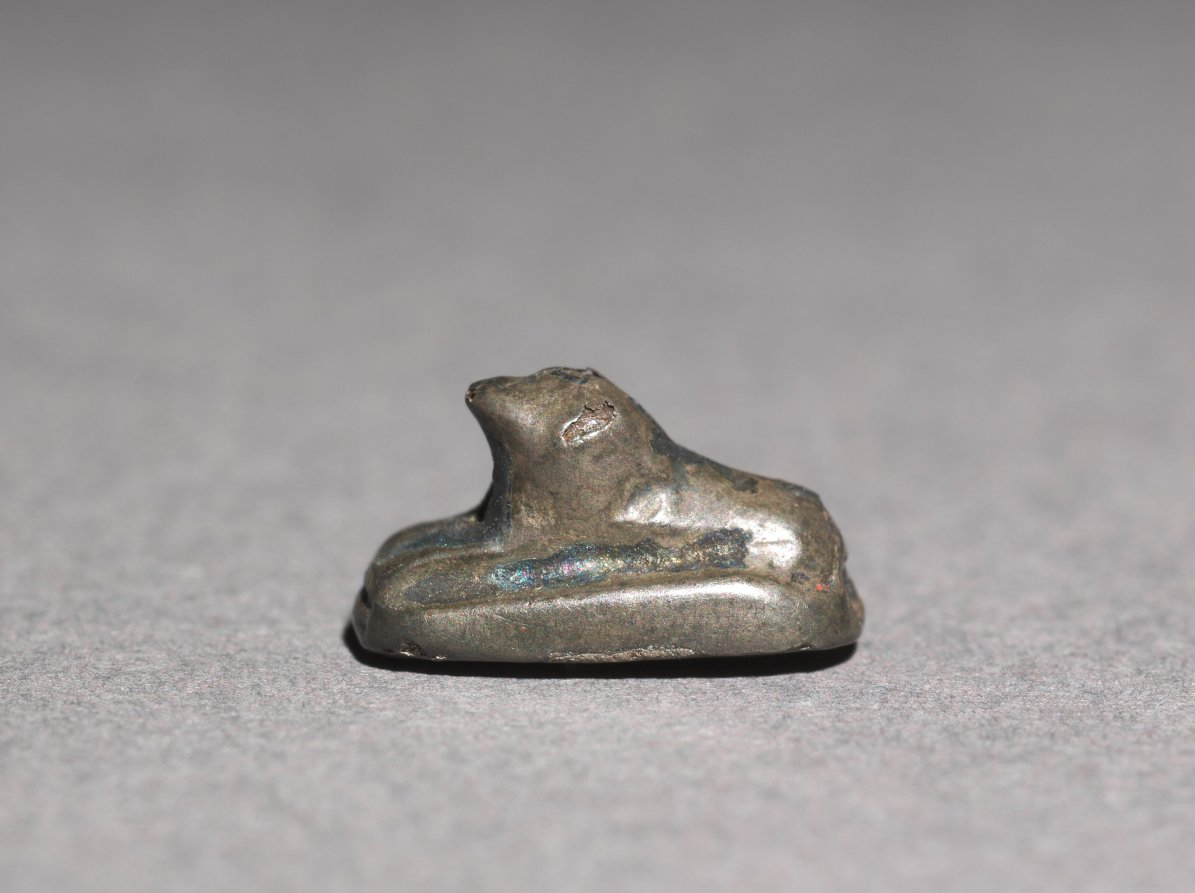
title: Recumbent Lion Bead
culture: Egypt, Middle Kingdom (2040–1648 BCE), Dynasty 12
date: 1980–1801 BCE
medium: silver foil over a clay-bulked resin core (?)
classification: Amulets